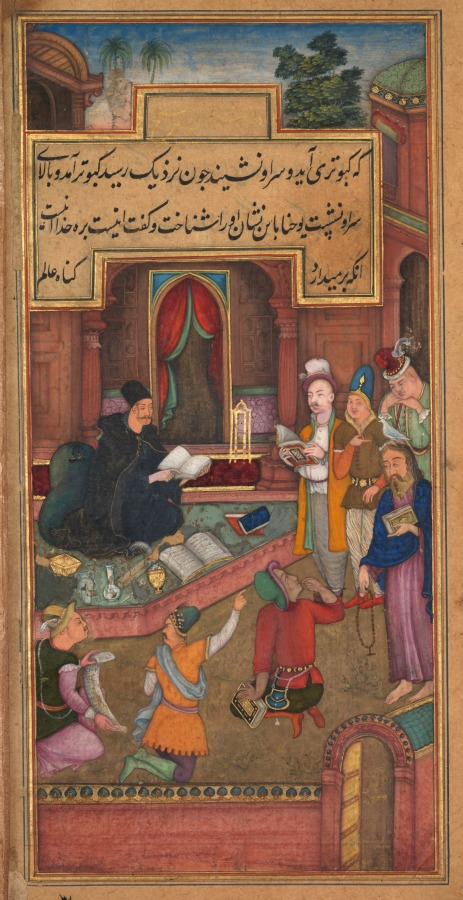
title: John the Baptist recognizes Christ by the appearance of a dove (folio 50 verso), from a Mirror of Holiness (Mir’at al-quds) of Father Jerome Xavier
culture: Mughal India, Allahabad, made for Prince Salim (1569–1627)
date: 1602–4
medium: Gum tempera, ink, and gold on paper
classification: Manuscript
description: Wearing the black robes and cap of a Jesuit priest, John the Baptist sits in a well-appointed Mughal-style courtyard. According to Father Jerome’s text, John recognizes Jesus by the dove who sits on his head. Possibly Father Jerome intended to relate the Gospel account that describes the dove of the Holy Spirit as hovering in the air above his head. The artist’s own reactions to this passage may be reflected in the expressions and gestures of the onlookers, who seem incredulous and bemused at this sign.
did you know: Jesus holds a rosary with a cross even in scenes prior to his crucifixion.